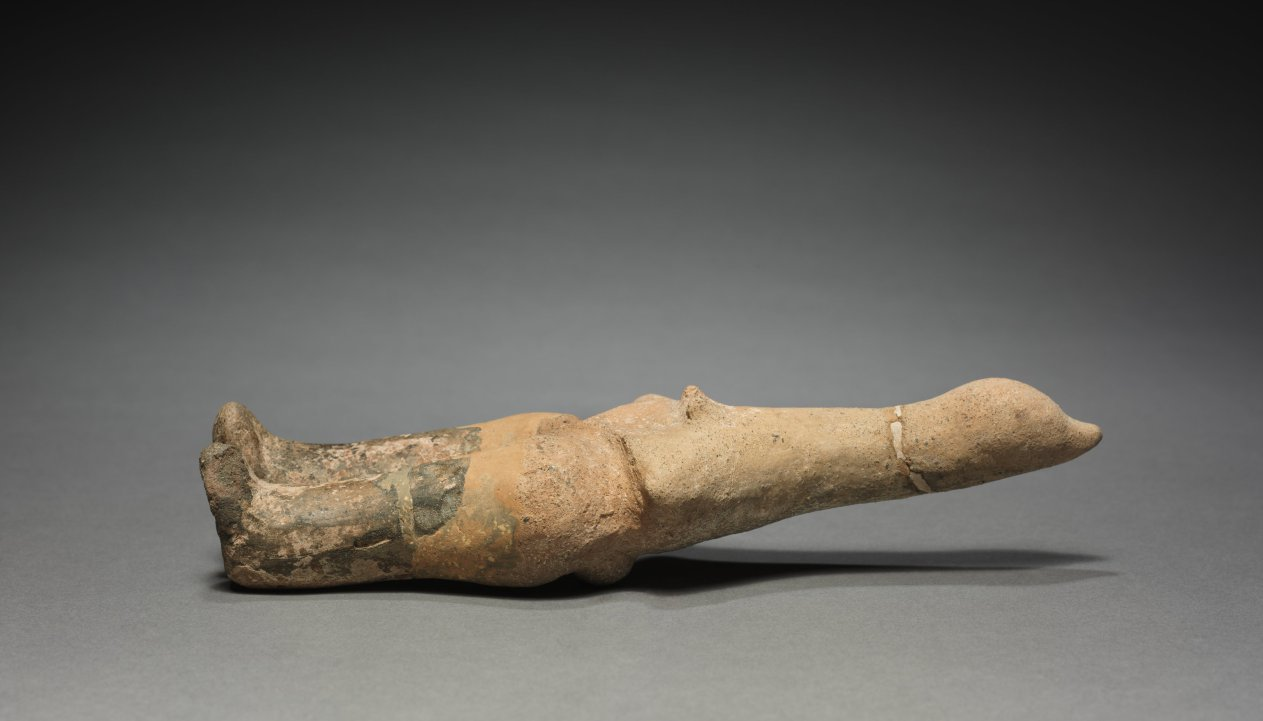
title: Figurine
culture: Iran, Amlash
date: 800s BCE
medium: terracotta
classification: Sculpture